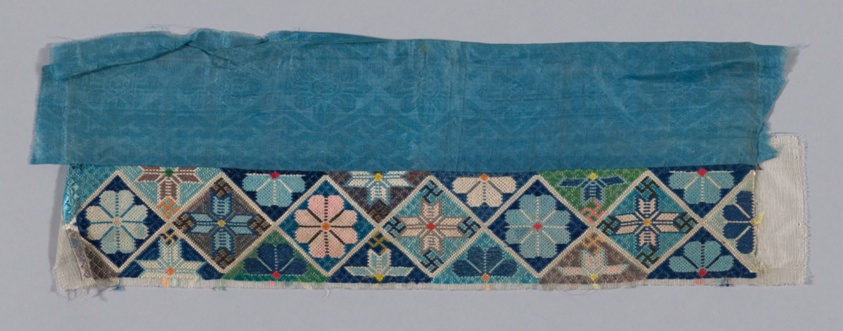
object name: Costume and Accessories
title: Band (from Woman's Trousers or Robe)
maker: China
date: 1875/1900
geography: China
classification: costume - needlework; needlework (visual works); costume